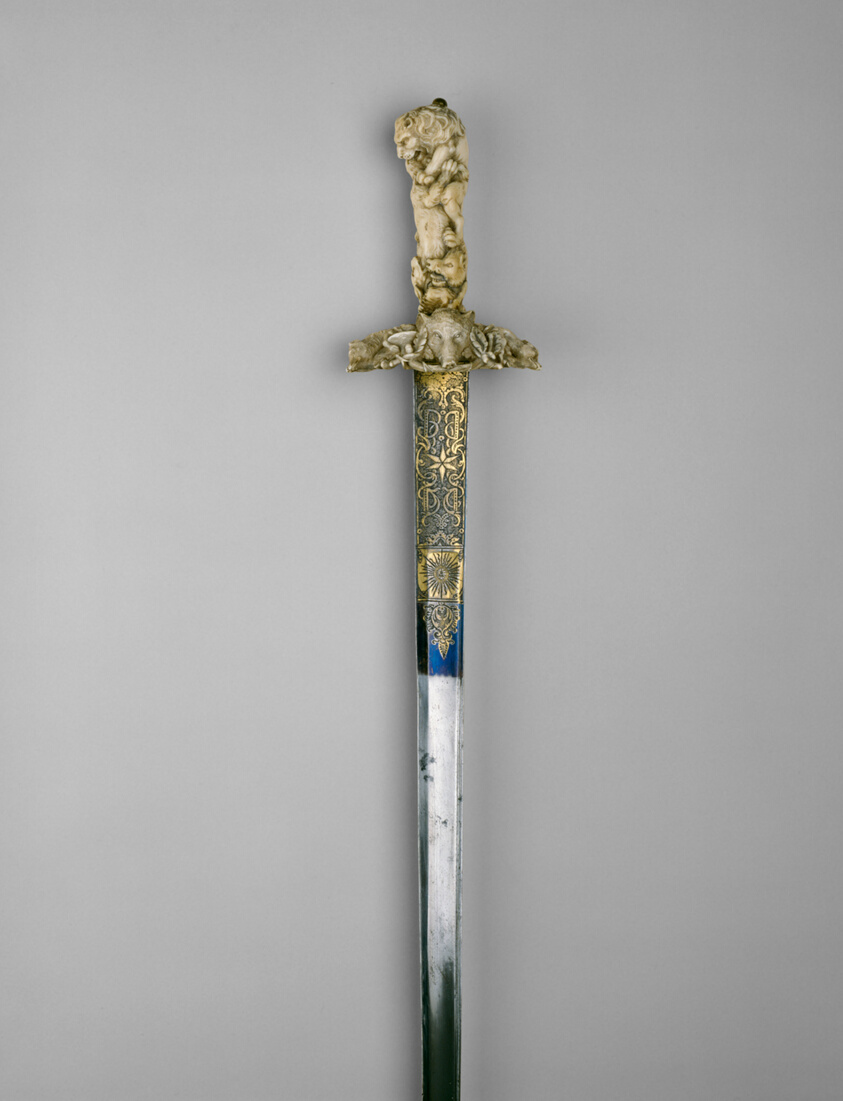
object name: Arms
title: Hunting Hanger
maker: Handle: German; Crossguard and Blade: German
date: Handle: about 1670 Crossguard and Blade: 18th century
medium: Steel, gilding, ivory, staghorn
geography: Germany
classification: edged weapon-sword; arms; arms and armor